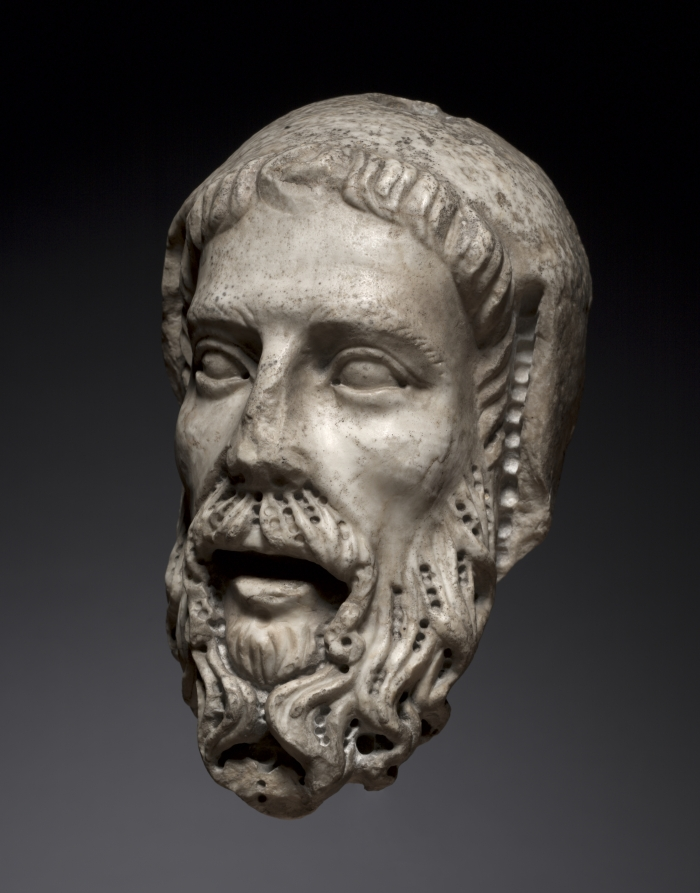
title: Head of a Prophet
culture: Italy, Siena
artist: workshop of Giovanni Pisano (Italian, c. 1240-c. 1320)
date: c. 1300–1325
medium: marble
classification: Sculpture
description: This head exhibits many of the characteristics of the style associated with the workshop of Giovanni Pisano. These are particularly noteworthy in the sensitive carving of the haunting face and its strikingly drilled beard. The head compares favorably to the sculpture made while Giovanni was master of works at Siena Cathedral (1285-97). Recent research suggests that it may once have belonged to a full-length Old Testament prophet looming on the exterior of Siena Cathedral.